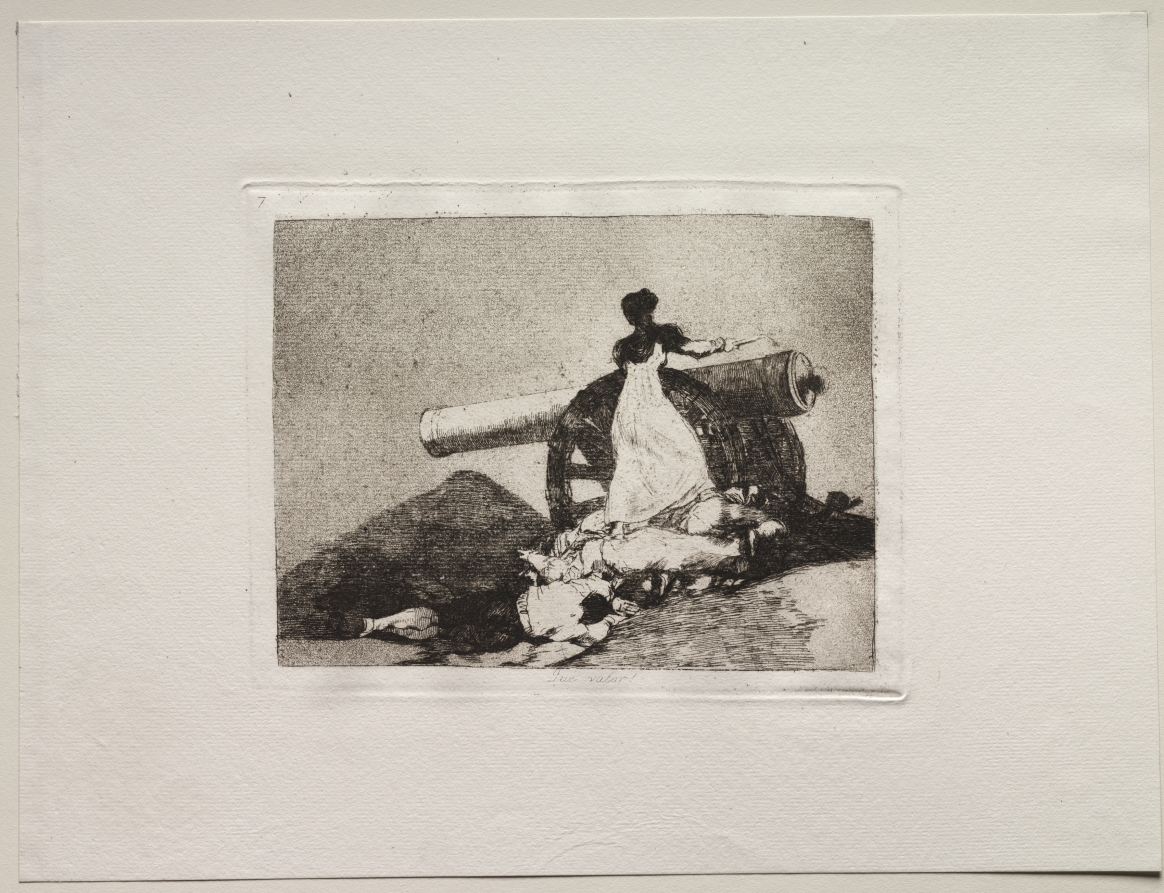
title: The Horrors of War: What Courage!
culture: Spain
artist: Francisco de Goya (Spanish, 1746–1828)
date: 1810–20, published 1863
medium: etching and aquatint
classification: Print